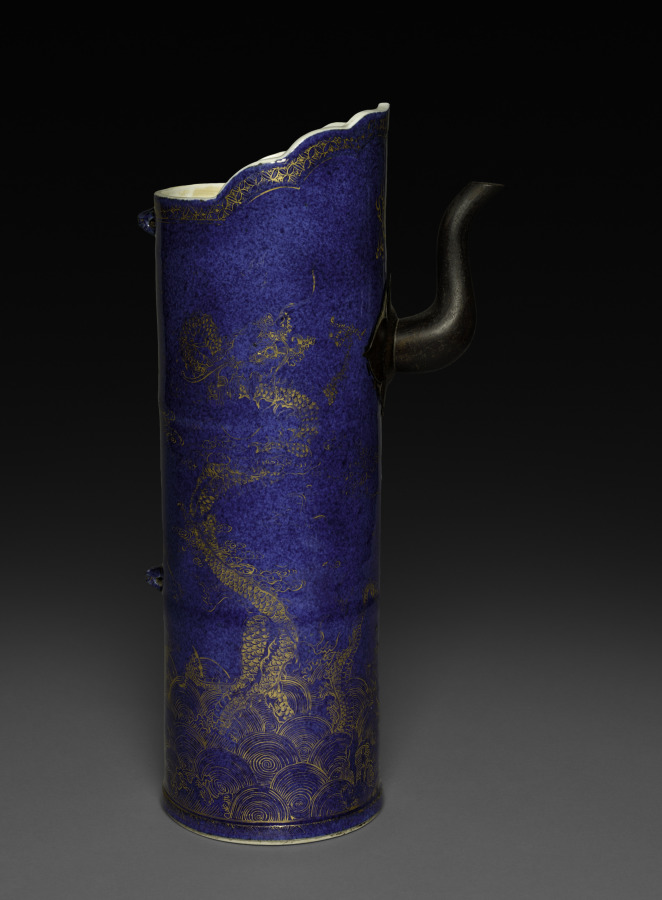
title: Cylindrical Ewer with Dragons Pursuing Flaming Jewel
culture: China, Jiangxi province, Jingdezhen kilns, Qing dynasty (1644-1911), Kangxi reign (1662-1722)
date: 1662–1722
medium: porcelain with powder blue glaze painted with gold decoration and supplied with metal fittings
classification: Ceramic